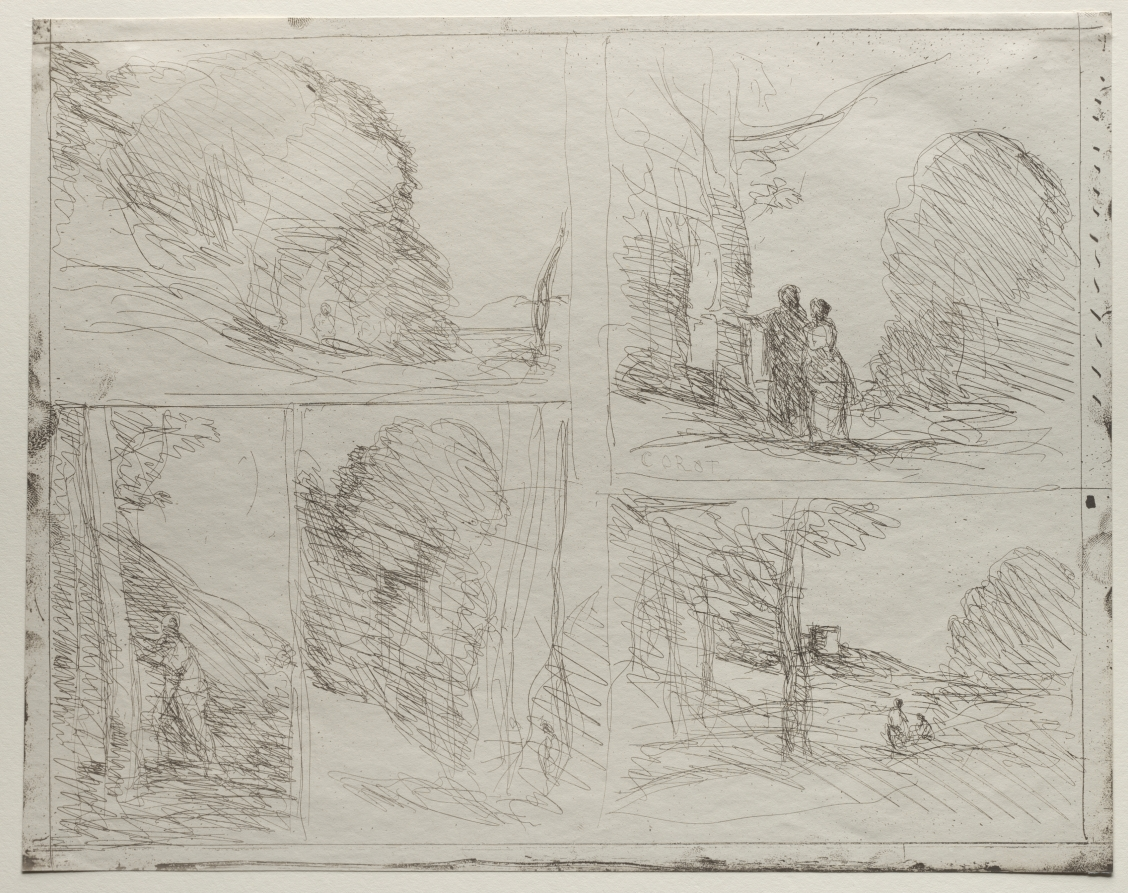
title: The Garden of Pericles; The Painter's Lane; Scrawl; The Large Woodcutter; The Tower of Henry VIII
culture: France, 19th century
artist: Jean Baptiste Camille Corot (French, 1796–1875)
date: original impression 1856, printed in 1921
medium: cliché-verre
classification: Print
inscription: signed, within image: "COROT" in the glass plate